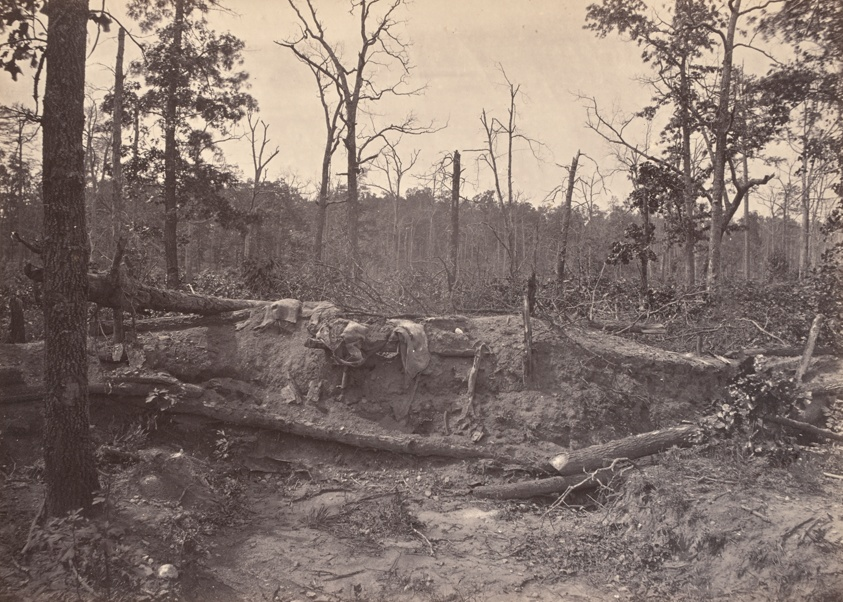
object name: Photograph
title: Battle Field of New Hope Church, GA, No. 2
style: 19th century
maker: George N. Barnard (American, 1819–1902)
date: 1866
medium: Albumen print, from "Photographic Views of Sherman's Campaign"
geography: United States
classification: photography; albumen print from collodion negative; photograph; photographic process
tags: lundberg collection, battles, Sherman's Campaign 1866